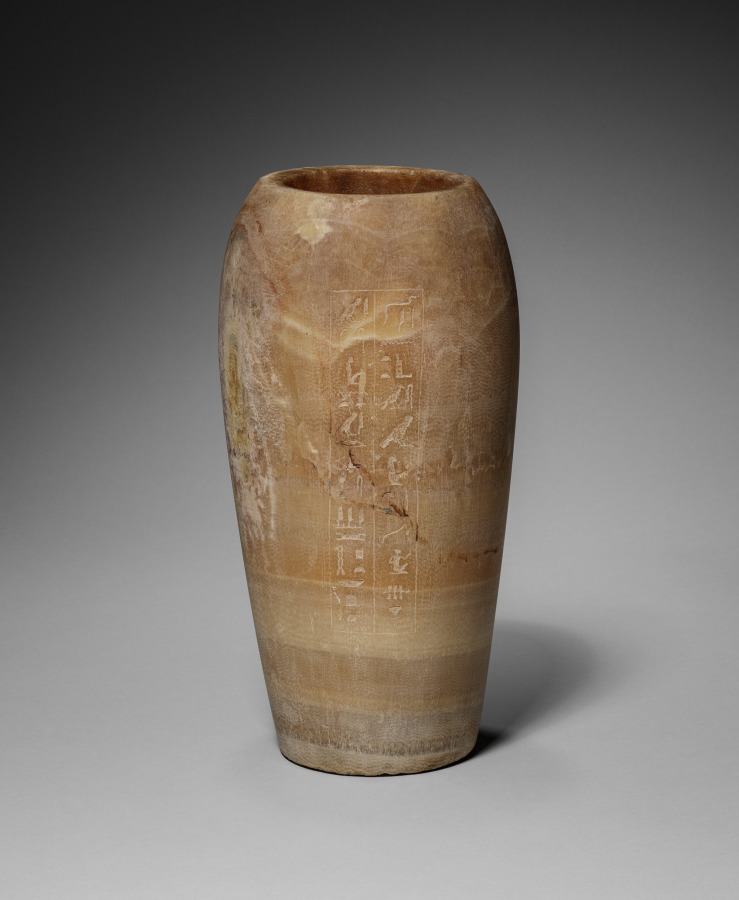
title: Canopic Jar with Jackal's Head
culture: Egypt, Late period (715–332 BCE), Dynasty 26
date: 664–525 BCE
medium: travertine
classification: Funerary Equipment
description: In the process of mummification, the liver, lungs, stomach, and intestines were removed, separately embalmed, and stored in specialized jars known as canopic jars (after a sailor in Greek mythology, who died at the town of Canopus in the Nile Delta and was worshipped there in the form of a human-headed jar). Each organ was identified with one of four funerary deities collectively known as the Sons of Horus: the liver with Imsety (man's head), the lungs with Hapy (baboon's head), the stomach with Duamutef (jackal's head), and the intestines with Qebehsenuef (falcon's head). It was their duty to protect the deceased and restore to him his body parts in the hereafter.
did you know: This jar is made of travertine stone-- subtle in color and with a captivating natural pattern-- with hieroglyphics carved on the front. Such jars were used to hold internal organs of the deceased and to preserve them for the afterlife.